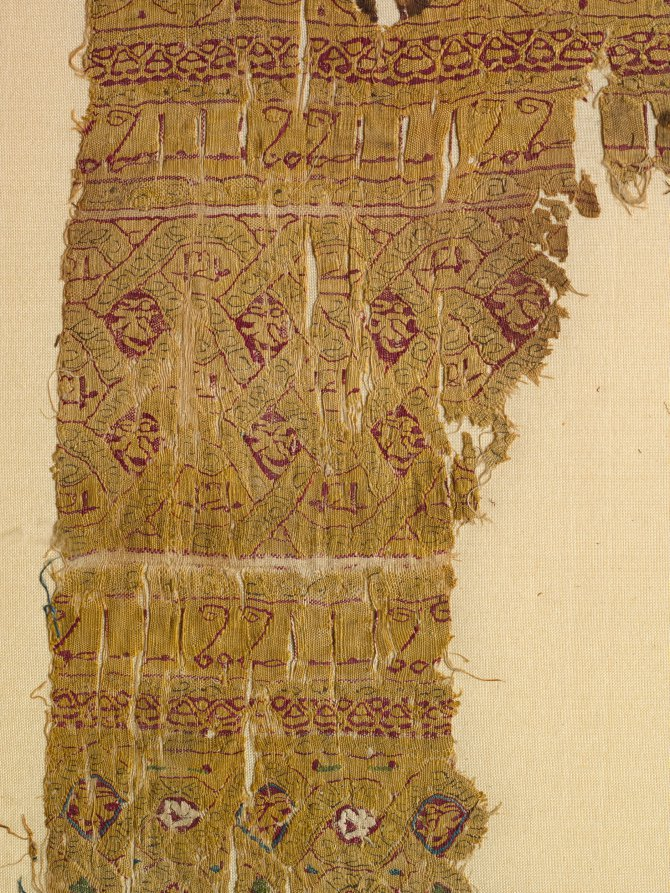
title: Tiraz with guilloche bands and fringe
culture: Egypt, Fatimid period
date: 1100s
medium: linen and silk: plain weave with inwoven tapestry weave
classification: Textile